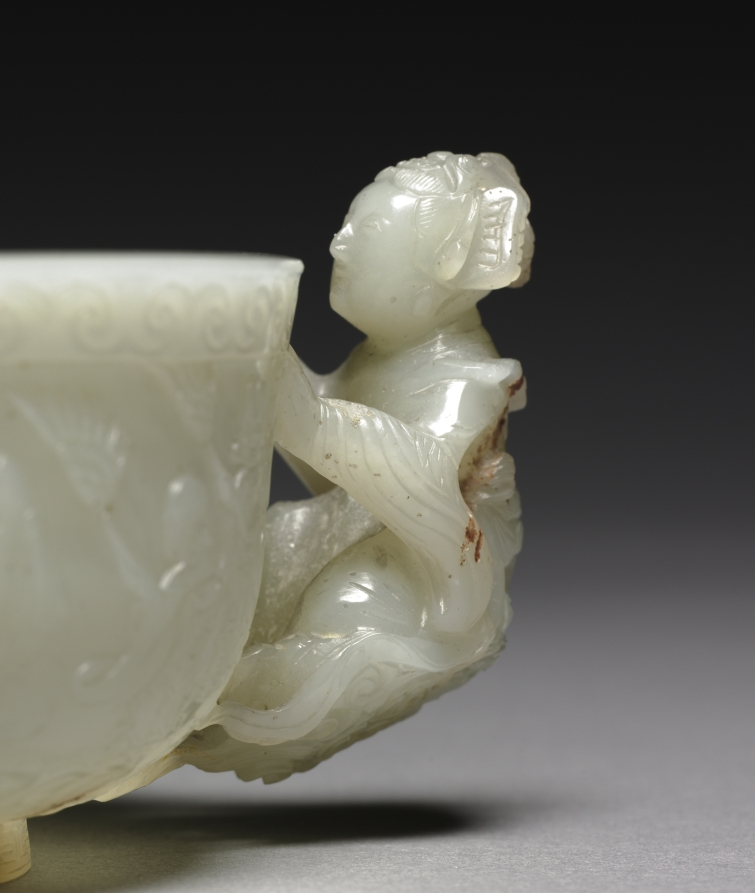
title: Cup with Daoist Figures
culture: China, Qing dynasty (1644–1911), Qianlong period (1736–95)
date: 1736–95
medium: Pale greenish-white jade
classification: Jade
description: During the Qing dynasty, Suzhou’s best products were sent north to the capital. Those that met imperial approval were sometimes graced with Qianlong’s mark, added by calligraphers and jade workers at court. The lack of a Qianlong mark on the Cleveland cup suggests that it might not have reached the court. Previously dated to the Yuan dynasty (1271–1368), new scholarship dates this cup to the Qing period.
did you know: Two female immortals serve as handles, while a Daoist procession with immortals, musicians, and attendants winds around the body of the cup.